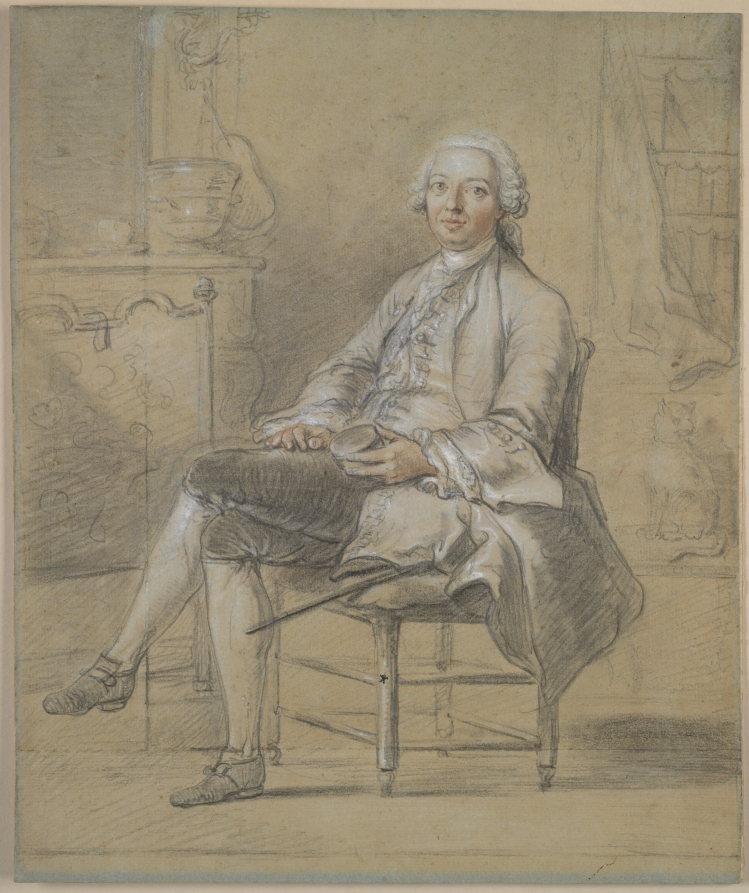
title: Seated Man Holding a Snuff Box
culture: France, Paris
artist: attributed to Louis Aubert (French)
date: c. 1750–1760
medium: black and red chalk, heightened with white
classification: Drawing